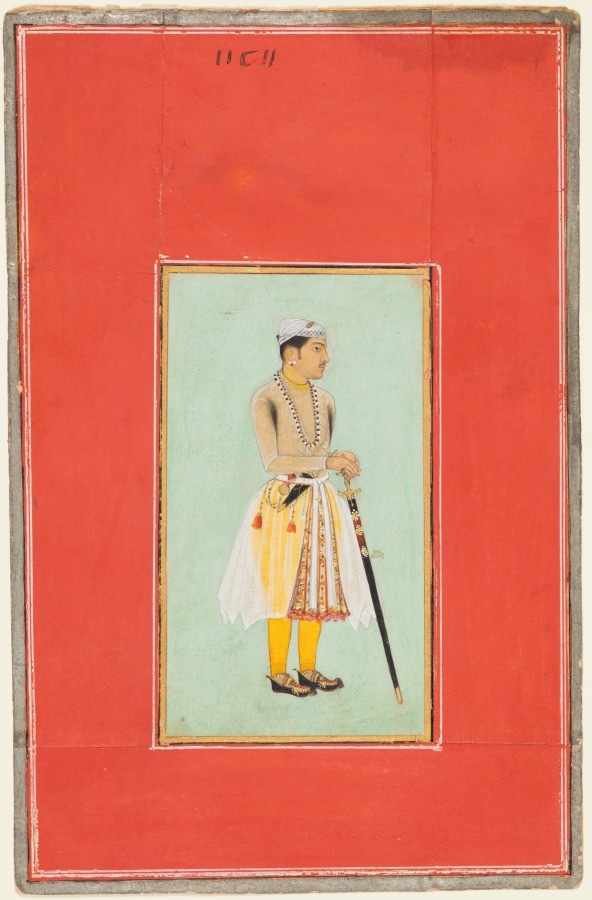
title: Portrait of Prince Sur Singh Rathor of Bikaner (1594–1631)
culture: Northwestern India, Rajasthan, Rajput Kingdom of Bikaner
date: 1611–13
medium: Gum tempera and gold on paper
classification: Painting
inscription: inscribed on the recto nagari number 8. Inscribed on the verso ‘kuṃvara sūra siṃha jī’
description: A young prince stands against a light blue backdrop, dressed in white translucent muslin jama (belted tunic) and yellow trousers. He has a dagger safely tucked in his sash while he holds a long straight sword encased in a black sheath. Religious markings (tilakas) on his forehead, neck, and ear indicate that he was a follower of the Hindu god Vishnu, who was popular among the royal houses of Rajasthan.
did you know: A coin purse hangs by a gold chain from his belt.